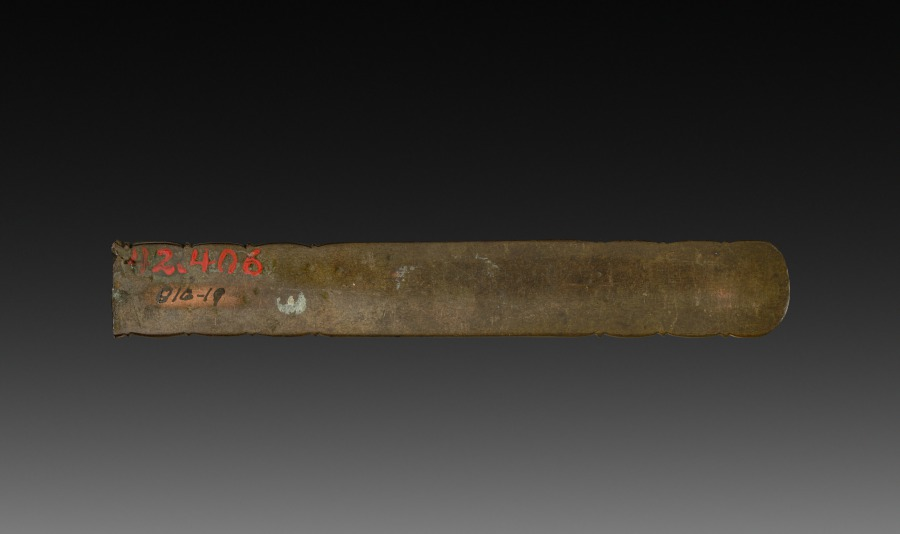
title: Knife Handle (Kozuka)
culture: Japan, Edo period (1615–1868)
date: c 1800s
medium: inlaid bronze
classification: Metalwork